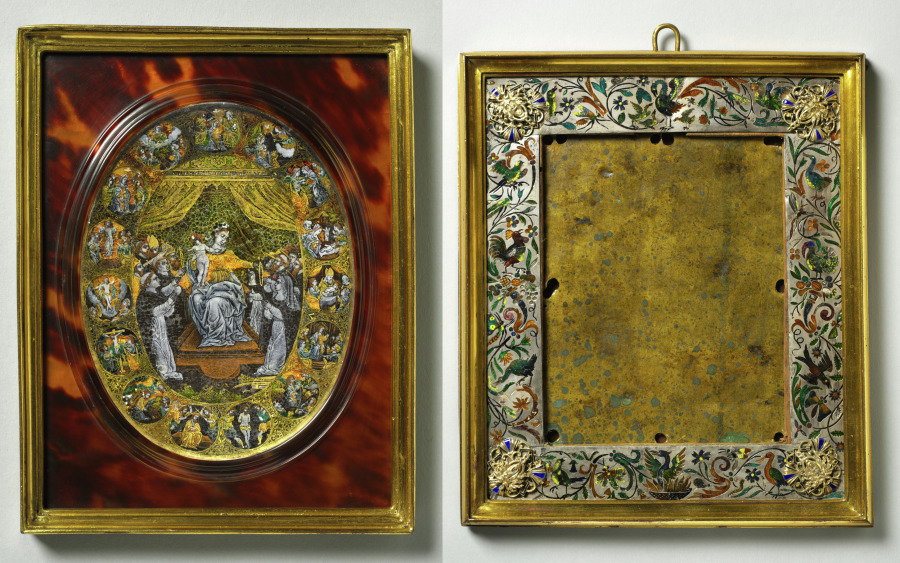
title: Plaque Depicting the Madonna and Frame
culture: Italy, 16th century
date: mid 1500s for plaque c. 1600 for frame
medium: enamel on copper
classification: Glass